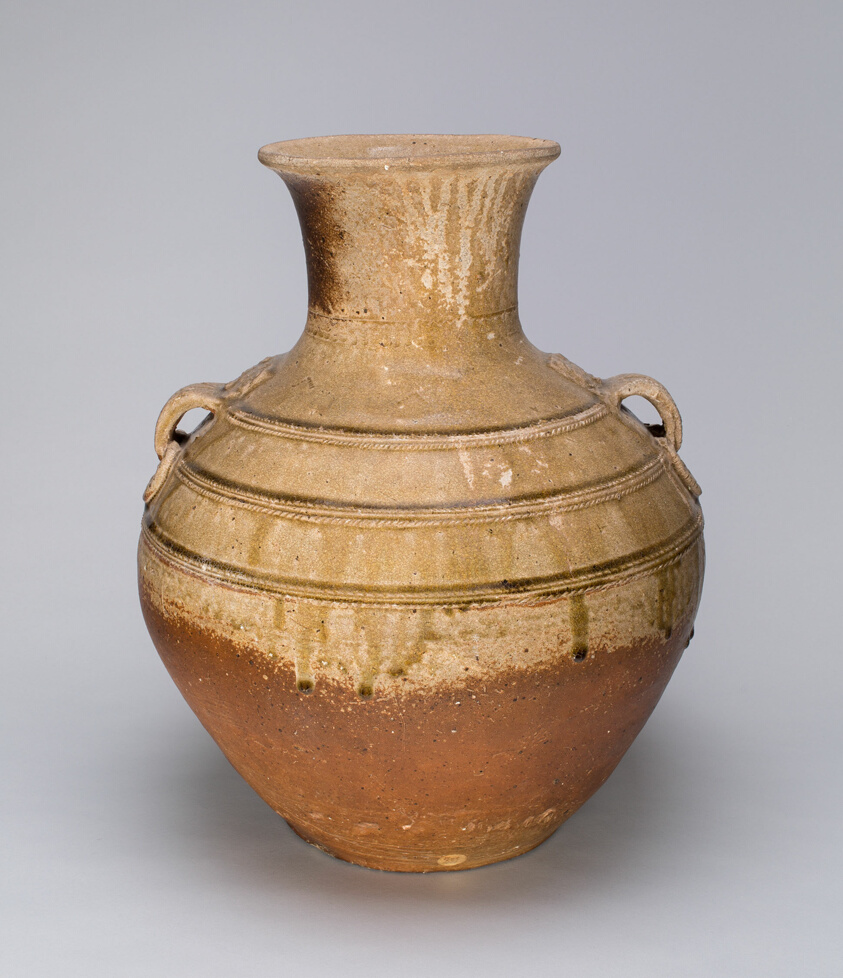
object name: Vessel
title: Globular Jar with Ring Handles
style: Chinese (culture or style)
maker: China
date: Western Han dynasty (206 B.C.–A.D. 9), 1st century B.C.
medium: Stoneware with olive-green glaze and incised, impressed decoration and relief cordons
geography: China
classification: stoneware; ceramics; asian art; vessel